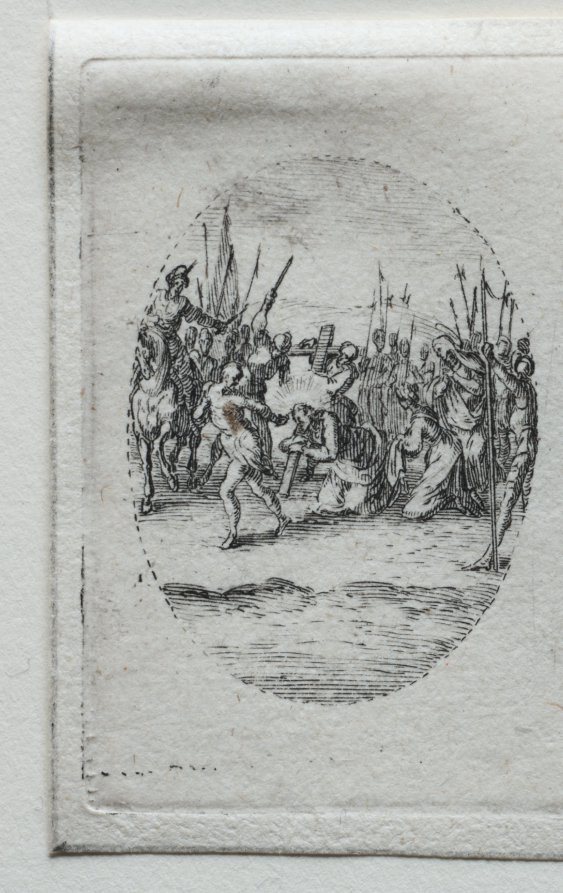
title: The Mysteries of the Passion: The Carrying of the Cross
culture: France, 17th century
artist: Jacques Callot (French, 1592–1635)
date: 1631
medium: etching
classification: Print